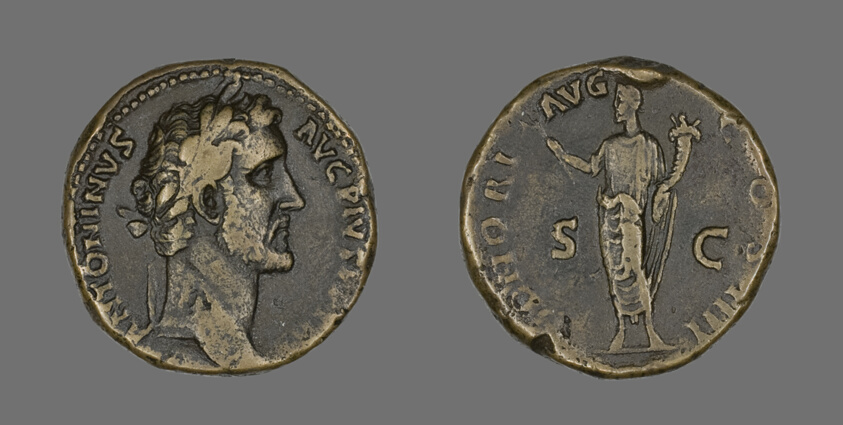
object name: Coin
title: Sestertius (Coin) Portraying Emperor Antoninus Pius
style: roman (ancient, style or period)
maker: Roman, minted in Rome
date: 145-161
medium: Bronze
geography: Roman Empire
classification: coin; ancient art